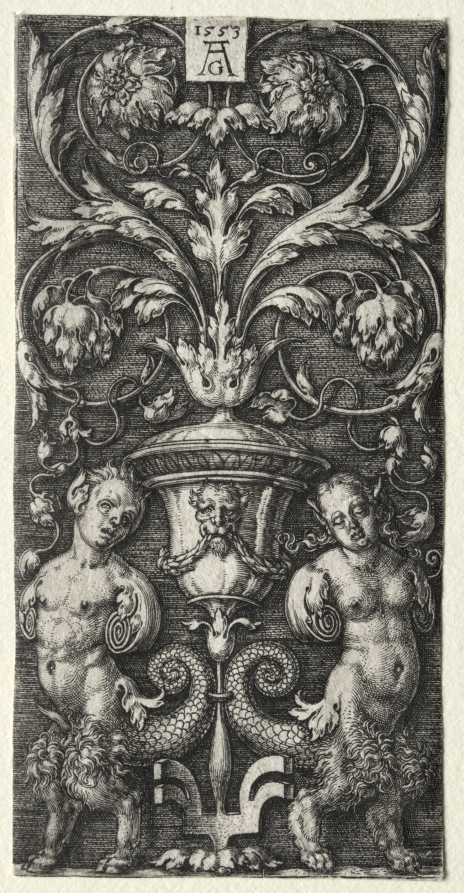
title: A Vase between Two Chimeric Figures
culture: Germany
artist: Heinrich Aldegrever (German, 1502–1555/61)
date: 1553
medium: engraving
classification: Print